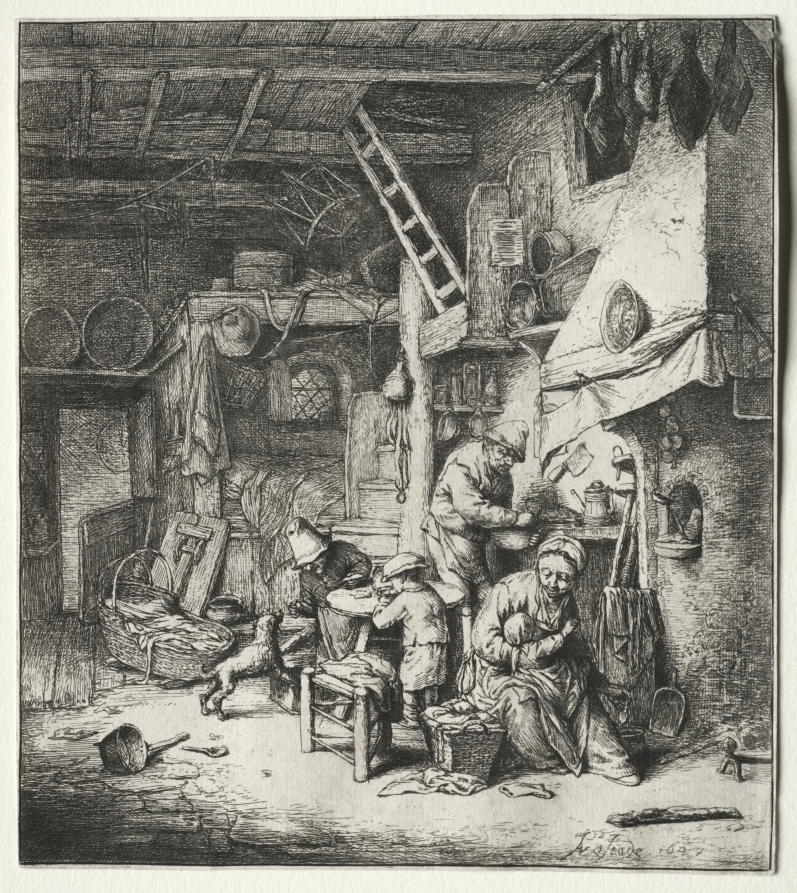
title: The Family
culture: Netherlands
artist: Adriaen van Ostade (Dutch, 1610–1684)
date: 1647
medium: etching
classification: Print